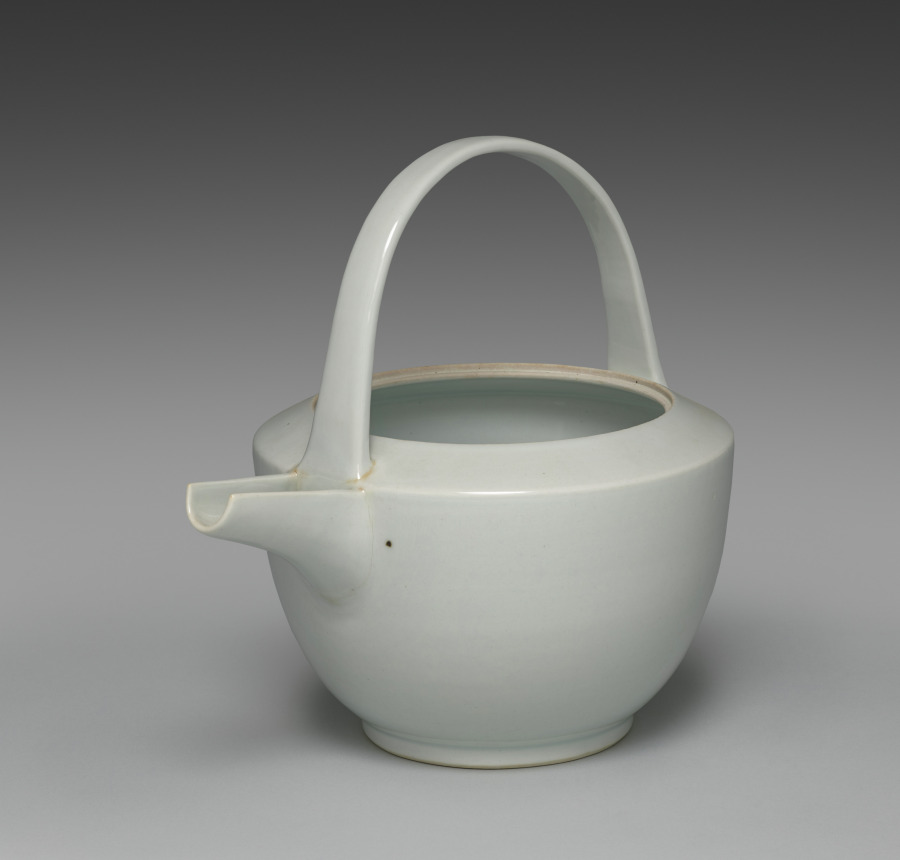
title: Sake Pourer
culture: Japan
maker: Seifū Yohei III (Japanese, 1851–1914)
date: c. 1887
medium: Porcelain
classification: Ceramic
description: This sake pourer has a wide basin with a low foot; a generous spout open across the top half; a flat, round lid with a small knob recessed flush to the top of the container; and a tall, arched handle that meets the container where the top joins the basin at a sharp angle. This vessel is glazed but otherwise undecorated. Unlike the creamy white color of some Yohei III works, the white of this sake pourer has the bluish cast typical of porcelains produced in Kyoto.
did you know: Seifū Yohei III signed this sake pourer in underglaze blue on the base.